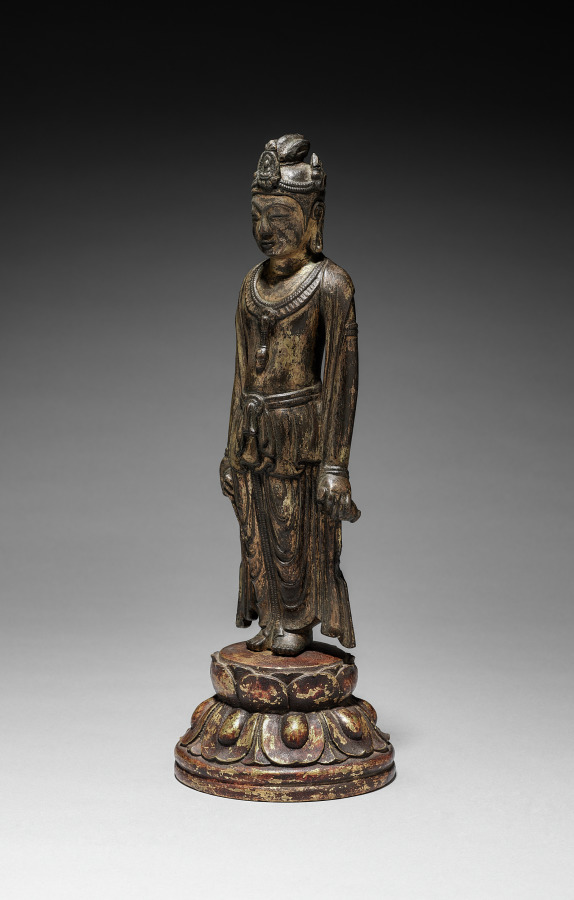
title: Kannon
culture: Japan, Asuka period (538–710)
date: mid-600s–early 700s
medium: gilt bronze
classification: Sculpture